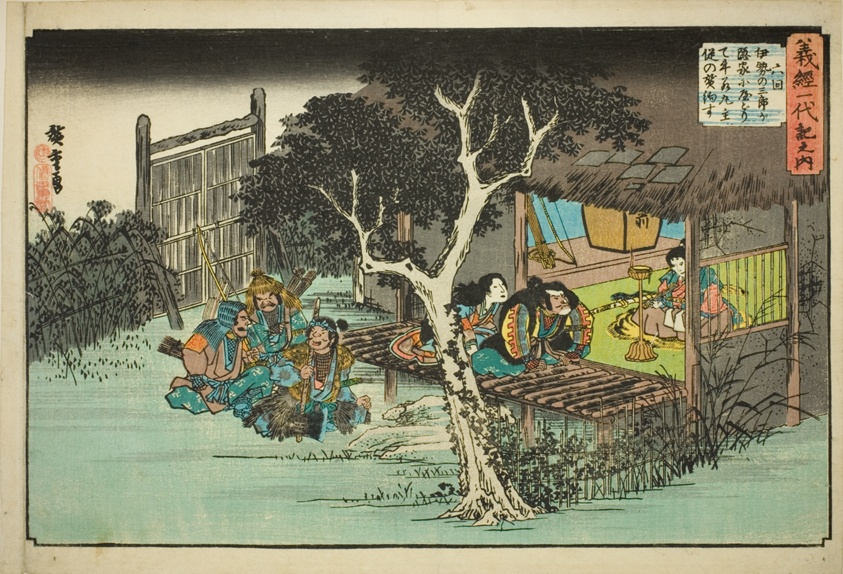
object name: Print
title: No. 6: Ise no Saburo Swears Loyalty to Ushiwakamaru (Rokukai, Ise no Saburo ga kakurega ni yadorite Ushiwakamaru shuju o yakusu), from the series "The Life of Yoshitsune (Yoshitsune Ichidaiki no uchi)"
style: Japanese (culture or style)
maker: Utagawa Hiroshige 歌川 広重; Japanese, 1797-1858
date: c. 1832/34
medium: Color woodblock print; oban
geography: Japan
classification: woodblock print; print; asian art